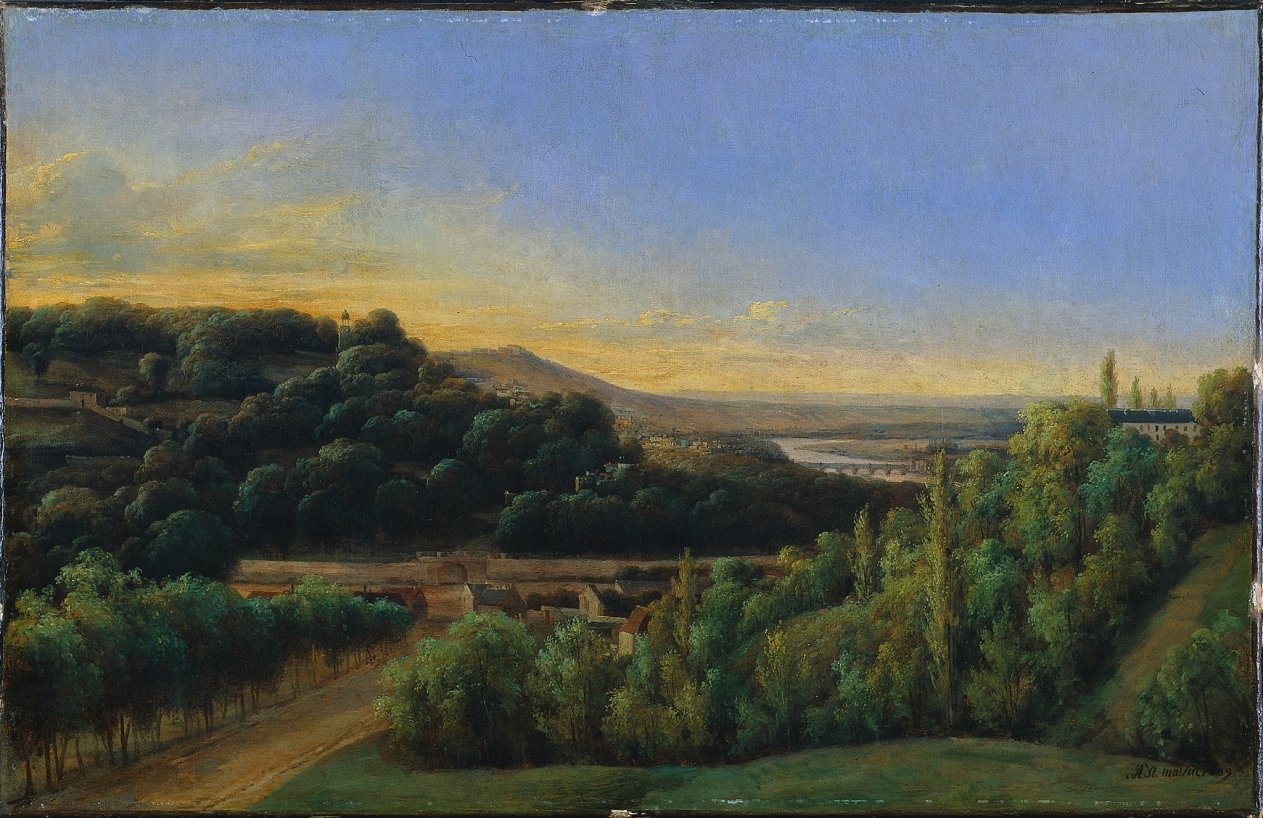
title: View of Saint-Cloud, Near the Seine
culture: France, 19th century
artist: Alexandre Pau de St. Martin (French)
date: 1809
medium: oil on fabric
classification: Painting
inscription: Signed lower right: AP St. Martin 1809 [AP in monogram]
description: This painting depicts the park associated with the royal Chateau of Saint-Cloud, famous for its terraced gardens overlooking the River Seine. At the left of the scene, one of the park's gazebos is set among the trees. This view from Saint-Cloud over the river was a traditional and popular one. Very little is known about the life of Pau de Saint-Martin. Most of his surviving works are landscapes, the titles of which indicate he painted in the Forest of Fontainebleau, southeast of Paris, as early as 1795. Perhaps the artist is most important as the teacher of his nephew Theodore Rousseau (1812–1867), who became the founder of the Barbizon school of landscape painting.